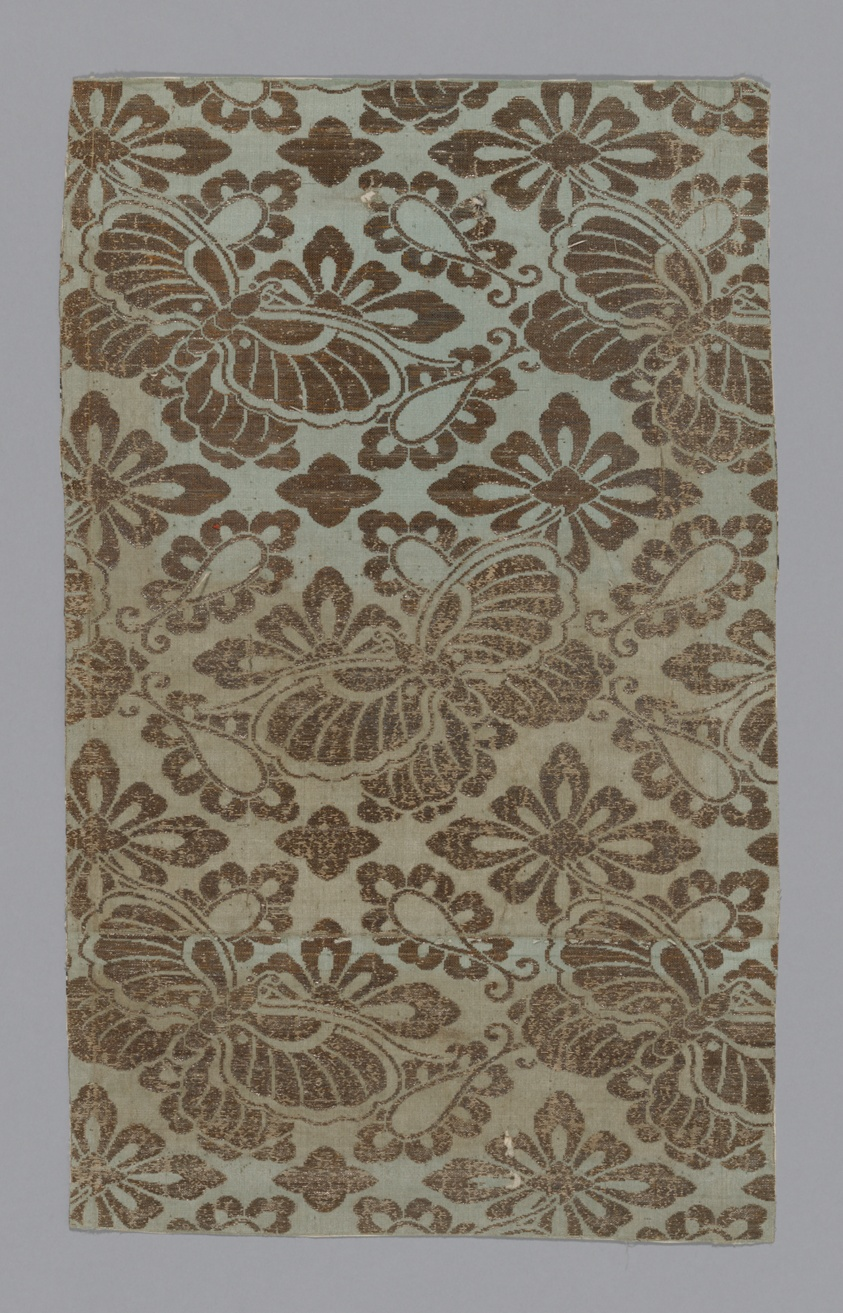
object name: Textile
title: Fragment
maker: Japan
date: Edo period (1615–1868), 1775/1825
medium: Plain compound cloth, silk & silvered paper; 2 1/2 strips to m.m.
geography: Japan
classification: weaving; textile